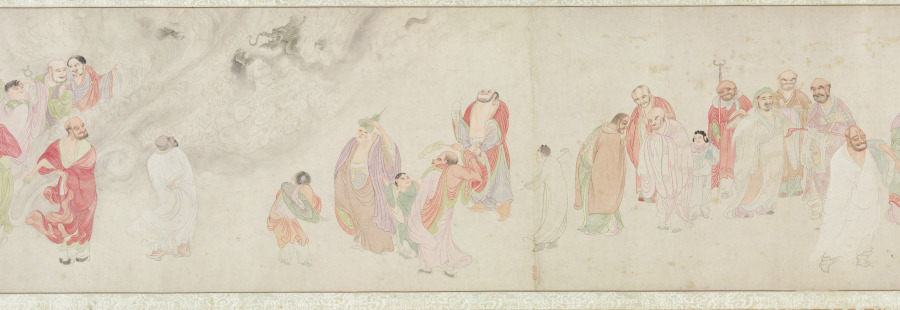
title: The Five Hundred Arhats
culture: China, Ming dynasty (1368–1644)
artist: Wu Bin (Chinese, active c. 1591–1626)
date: 1591–1626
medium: Handscroll; ink and color on paper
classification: Painting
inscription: 枝隱頭陀吳彬齋心拜寫 [印]吳彬之印; 文中父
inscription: 7 seals of Qianlong emperor (r. 1736–95): Gu xi tian zi 古希天子; Shou 壽; Qianlong jian shang 乾隆鑑賞; San xi tang jing jian xi 三希堂精鑑璽; Yi zi sun 宜子孫; Tai shang huang di zhi bao 太上皇帝之寳; Qian qing gong bao 乾清宮寶.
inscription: 6 seals of Cheng Qi 程琦 (1911–1988): Ke an geng zi wu shi yi hou suo de ming ji 可菴庚子五十以後所得名跡; 5 other Cheng Qi seals.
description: More than 66 feet long, this handscroll depicts 447 luohans, 72 attendants, and the bodhisattva of compassion at its very end. Luohans (arhats in Sanskrit), disciples of the Buddha and protectors of the Buddha’s law, possess supernatural powers and take on myriad external appearances. The amusing assortment of characters are engaged in an array of religious, secular, and miraculous activities. The painter used stylistic features borrowed from earlier artists, carefully controlled lines, and refined coloring. Wu Bin was a lay Buddhist and depicting this sort of image was part of a religious practice seeking understanding of the Buddha’s teaching.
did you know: Far advanced on the path to enlightenment, arhats have the capacity to tame tigers, free dragons, and to float on water or in the air.